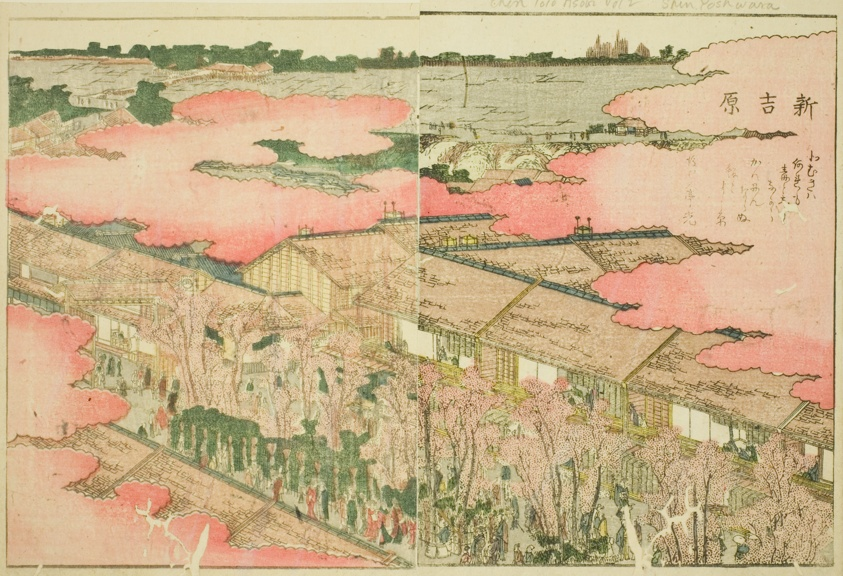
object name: Print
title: Shin Yoshiwara, from the illustrated book "Picture Book of Amusements of the East (Ehon Azuma asobi)"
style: Japanese (culture or style)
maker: Katsushika Hokusai 葛飾 北斎; Japanese, 1760-1849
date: c. 1802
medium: Color woodblock print; double-page illustration from book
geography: Japan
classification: woodblock print; print; asian art